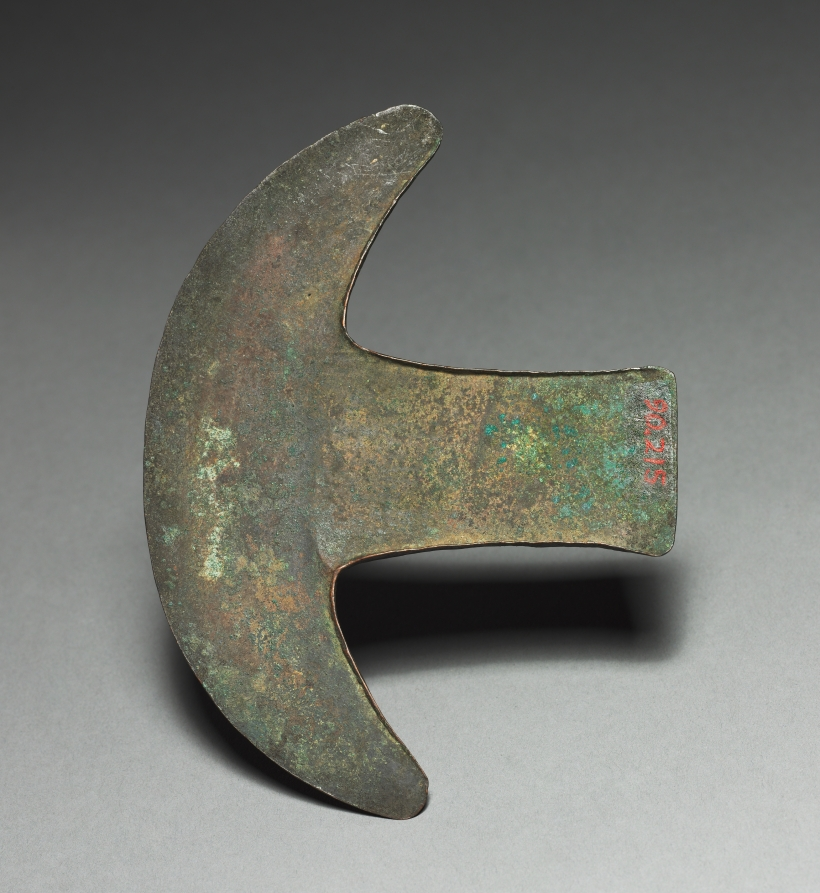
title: Axe-shaped Implement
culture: Mexico, Oaxaca, Mixtec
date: 1200–1519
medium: cast and hammered copper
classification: Metalwork